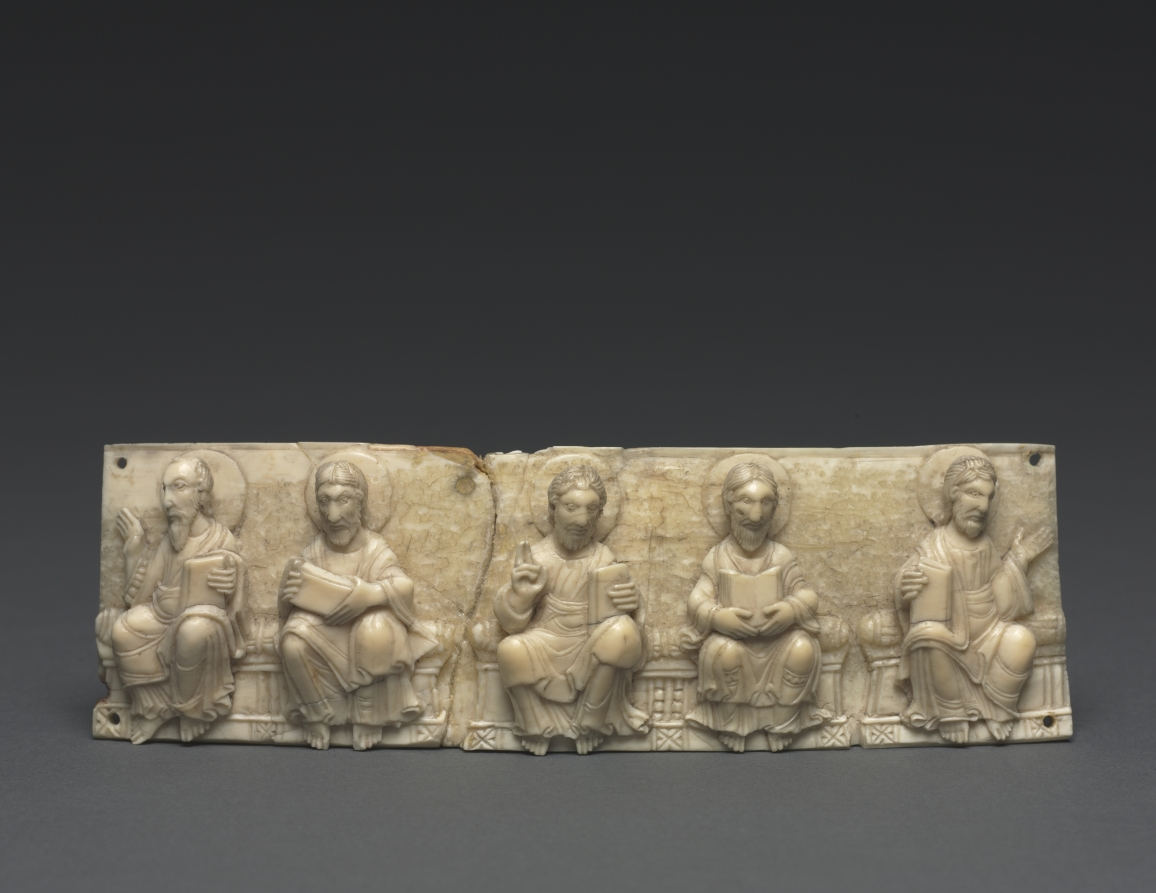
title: Plaque from a Portable Altar: Christ and the Apostles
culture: Germany, Lower Rhine Valley, Romanesque period, 11th century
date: 1050–1100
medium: walrus ivory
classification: Ivory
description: This intricately carved ivory panel once decorated the side of a portable altar. One of three it depicts Christ in Majesty and his apostles, and was the first major acquisition of William M. Milliken, the museum's first curator of decorative arts and later director (1930–1958). As Milliken later recalled, the pieces "were immensely intriguing, monumental in scale, even if tiny in size, the Christ in the mandorla could have been enlarged and would have graced the tympanum of a great cathedral."